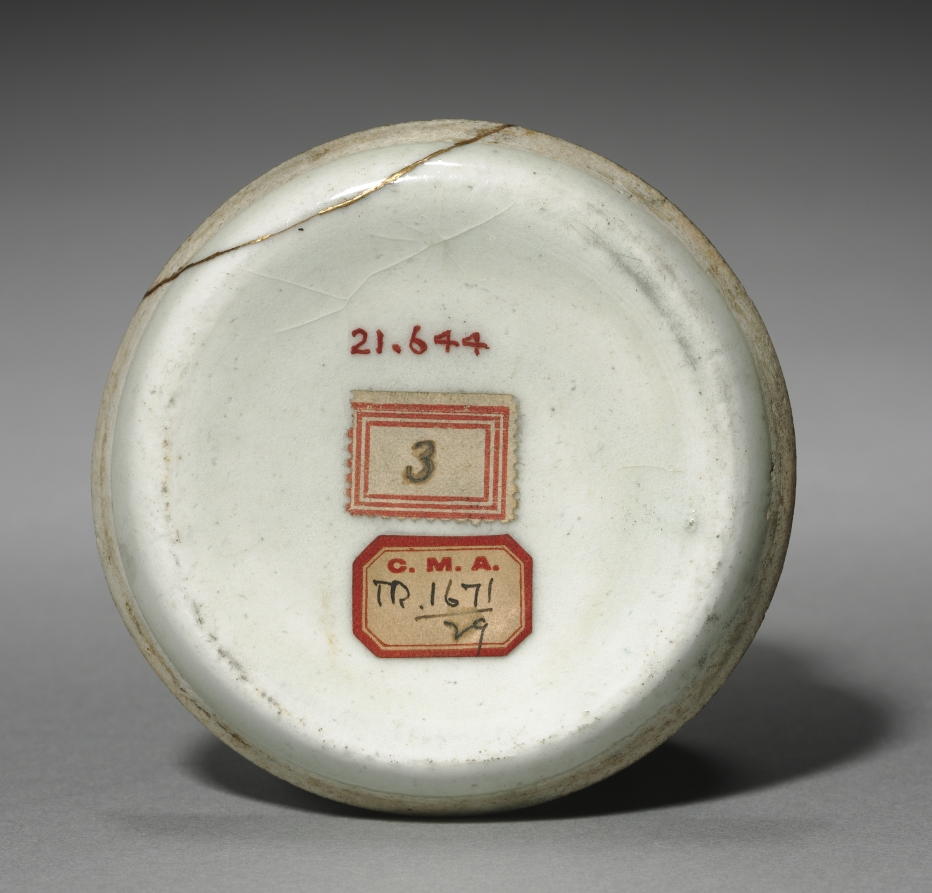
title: Dish with Incised Scroll Design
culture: China, Song dynasty (960-1279)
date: 900s–1100s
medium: Pottery with pale bluish-white glaze and incised design, Qingbai ("blue-white") ware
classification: Ceramic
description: While this dish was donated as a rare white celadon excavated from a Goryeo period tomb, it turns out to be a Song period Chinese Qingbai ware much enjoyed as a luxury item among Korean ruling elites in the Goryeo period (918–1392).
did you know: This lightly potted shallow dish is carved and combed with what might be flowering peony.